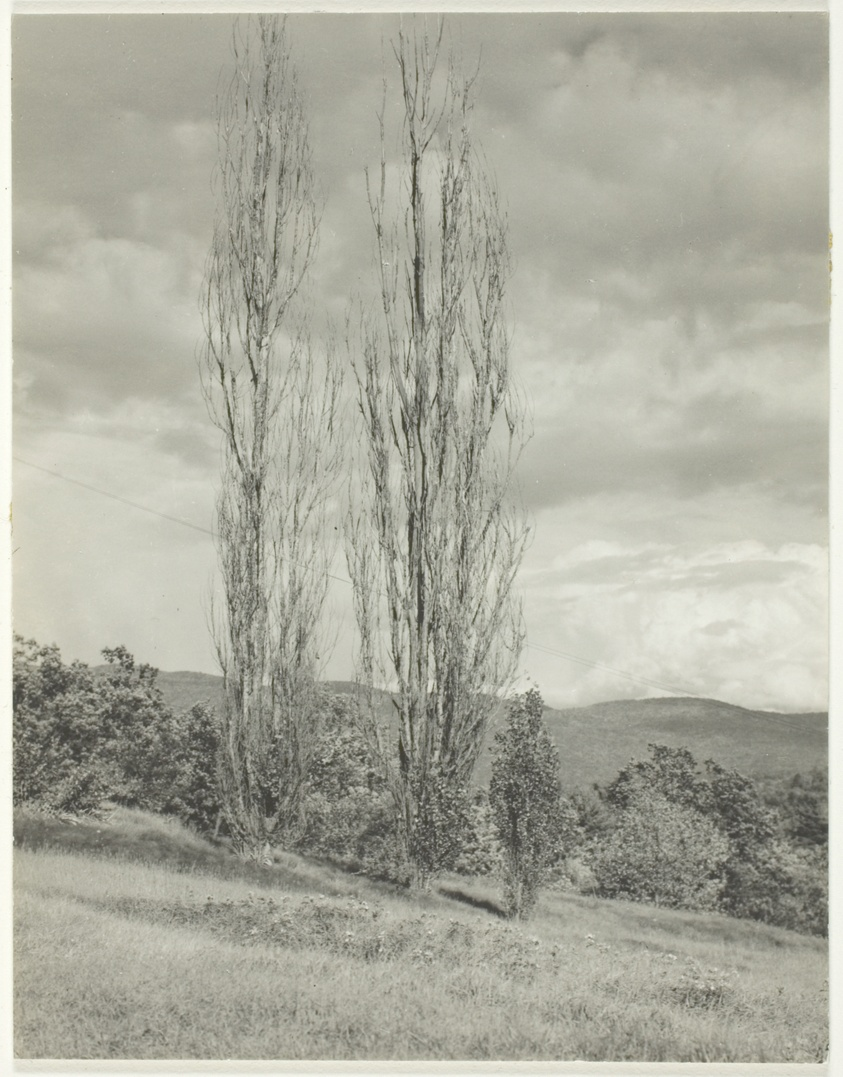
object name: Photograph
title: Poplars—Lake George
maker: Alfred Stieglitz (American, 1864–1946)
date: 1935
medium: Gelatin silver print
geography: United States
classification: gelatin silver (developing-out-paper) pr; photographic process; photography; photograph